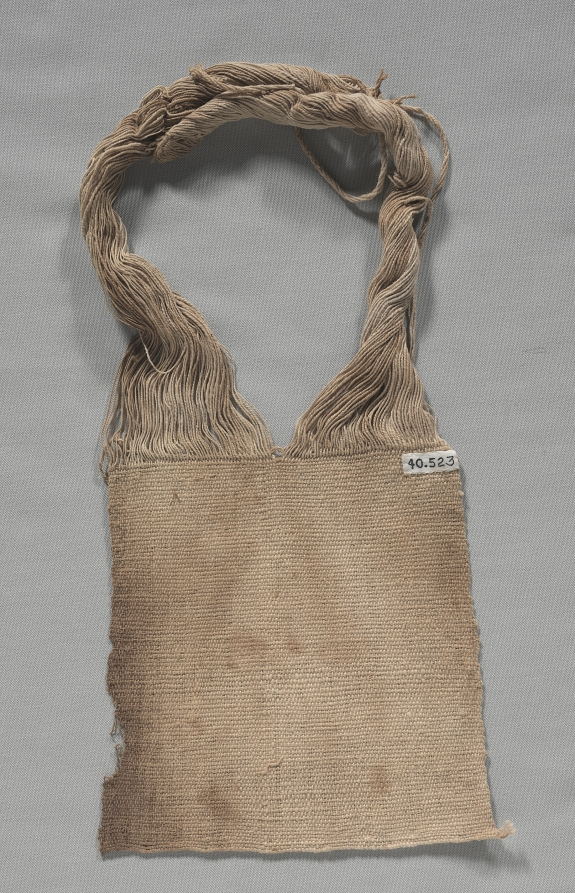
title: Mummy Bundle "Mask"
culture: Peru, South Coast, Ica Valley, Ocucaje site, Paracas style (700 BCE–1 CE)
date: 400–200 BCE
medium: Cotton and pigment; plain weave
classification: Textile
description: The Paracas people buried their dead in bundles that they created by carefully wrapping the seated human body in layers of garments and other textiles. In some cases, they placed a painted cloth—such as these examples—on the outer layer and at the top of the bundle. The hair-like yarns (unwoven warps) were arranged around a solid cotton disk that was sometimes wrapped with a headband. The cloths, then, seem to have functioned as the bundle’s head, even though some are painted not with faces but with complete figures whose supernatural character is marked by the appendages streaming from their bodies.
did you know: These masks fall into two categories, those with only a face and those with a full-bodied figure.